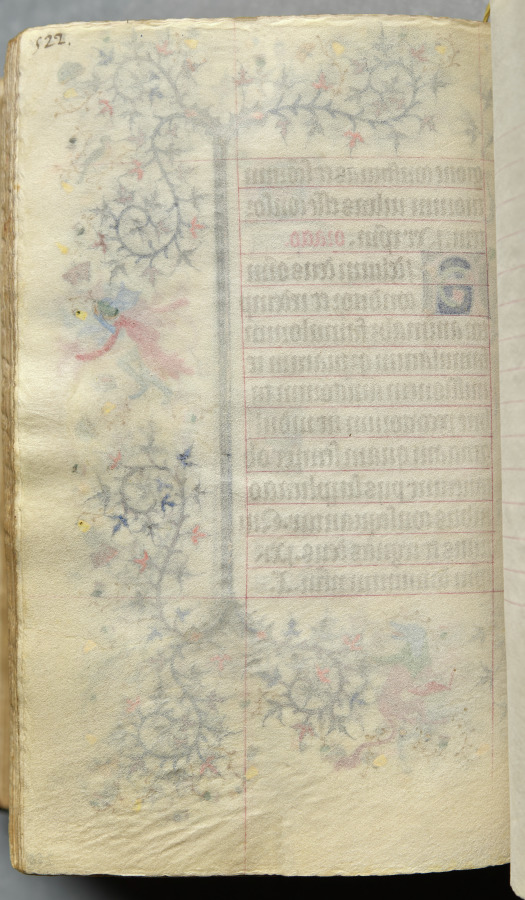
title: Hours of Charles the Noble, King of Navarre (1361-1425): fol. 253v, Text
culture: France, Paris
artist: Master of the Brussels Initials and Associates (French)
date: c. 1405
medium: ink, tempera, and gold on vellum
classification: Bound Volume